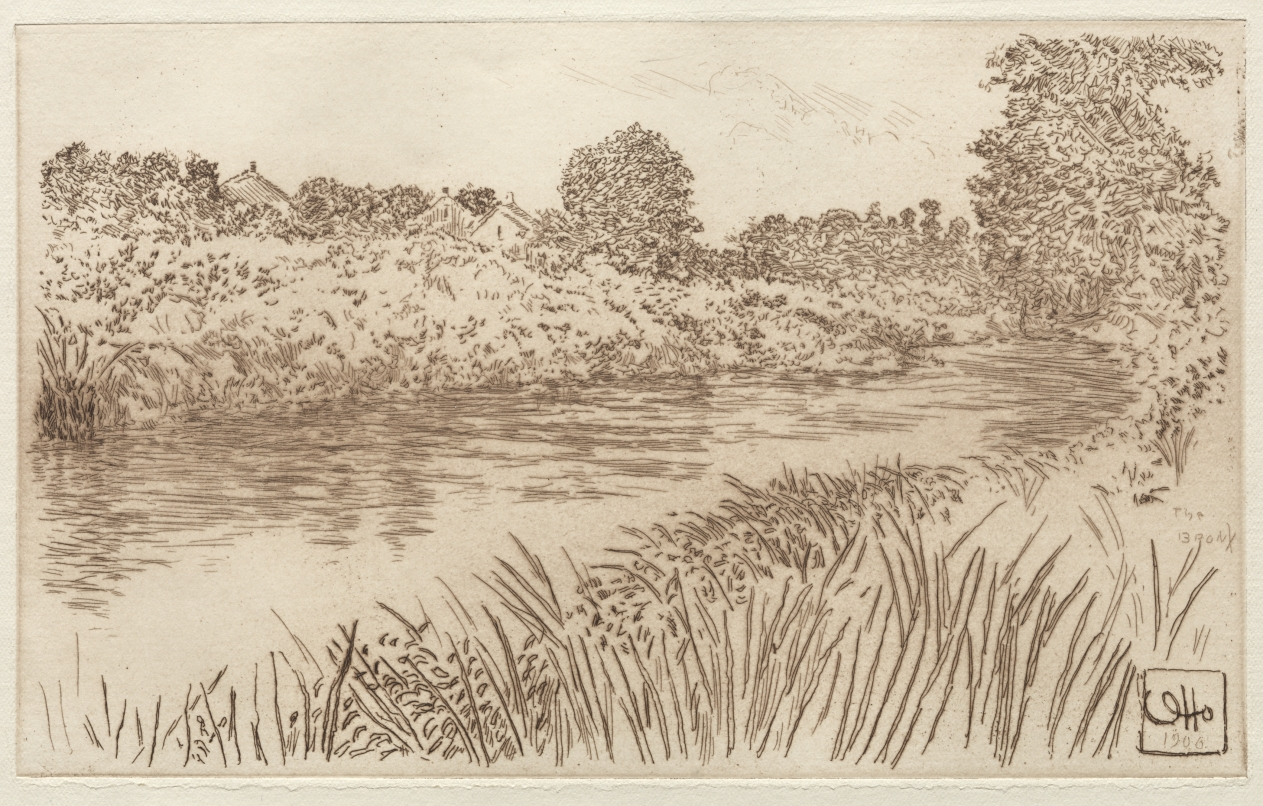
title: On the Bronx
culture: America, early 20th Century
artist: Otto H. Bacher (American, 1856–1909)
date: 1906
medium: etching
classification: Print